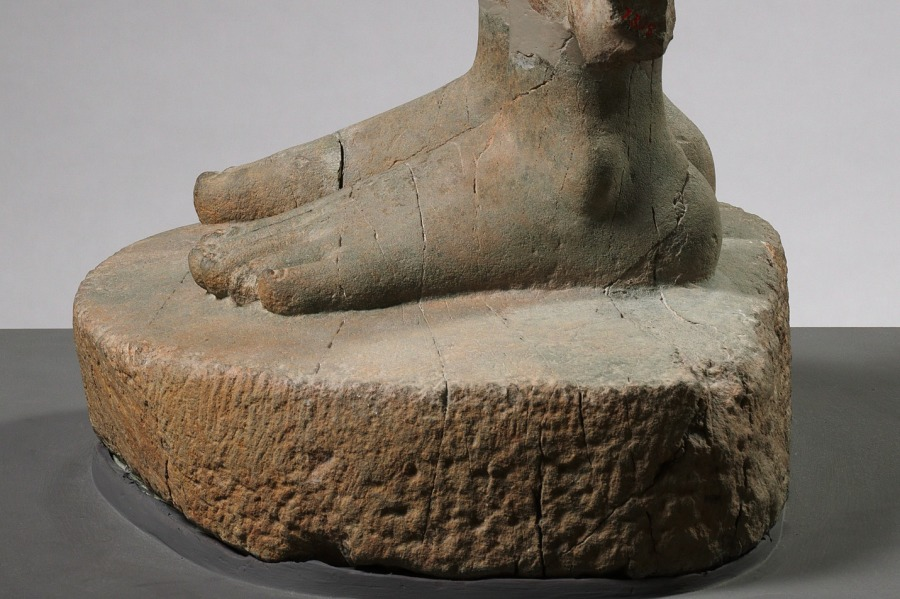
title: Feet for Standing Buddha (1973.15)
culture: Thailand, Mon-Dvaravati Period, c. 7th Century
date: c. 600s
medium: sandstone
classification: Sculpture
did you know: Now united for display, CMA acquired the sculpture in two pieces, when the body (CMA 1973.15) and the feet were found in separate locations.